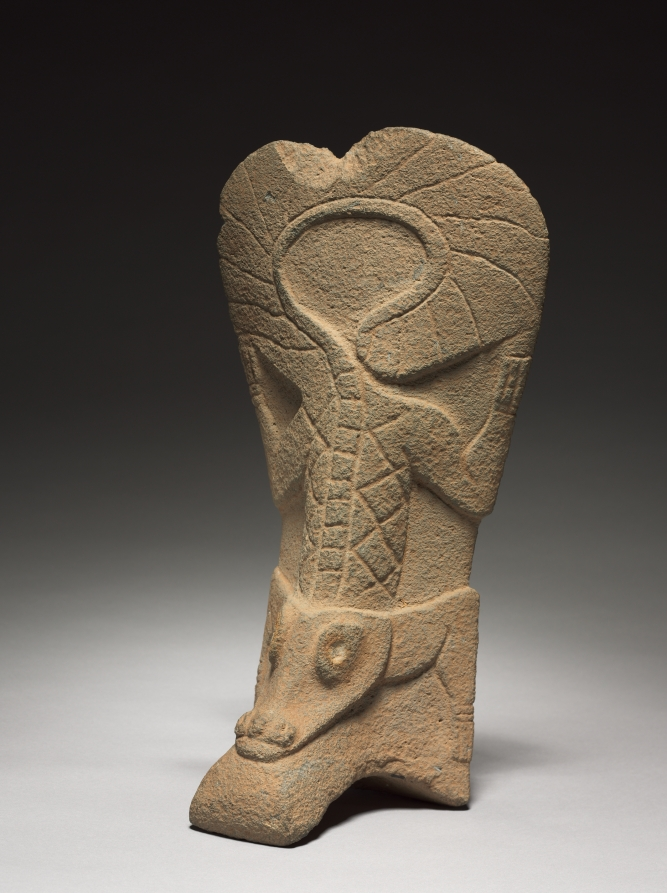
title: Ballgame Palma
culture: Mexico, Gulf Coast, Classic Veracruz style (600-1100)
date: 900–1100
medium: stone, pigment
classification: Sculpture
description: Stone palmas, so-called today for their palm-frond-like shape, are ceremonial sculptures that may replicate lightweight gear worn over the chest during the ballgame. Palma imagery is not well-studied and the meaning of the caiman (New World alligator) carved on both sides of this example is unknown. The tail is beautifully adapted to the palma's curved upper edge.